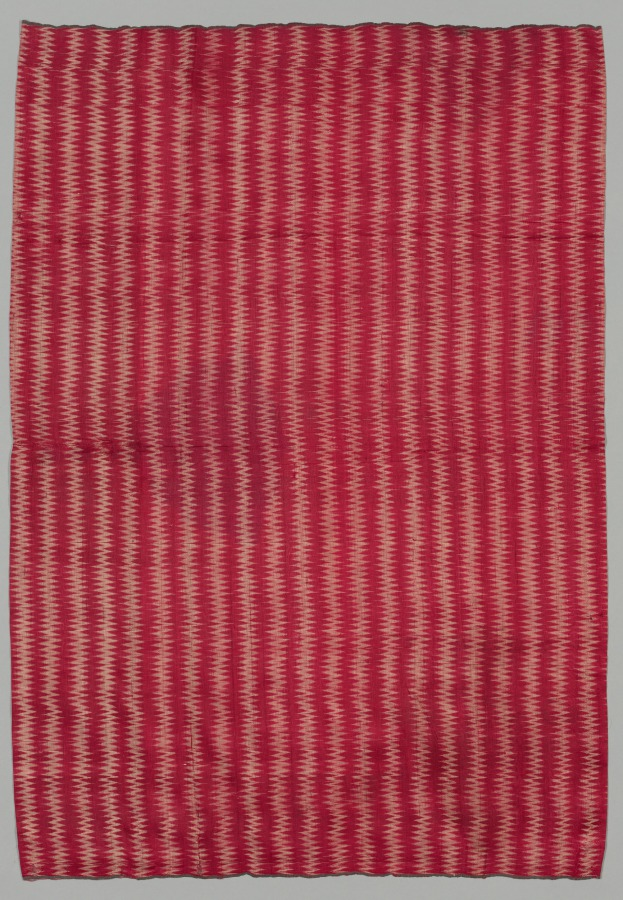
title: Fragment of Striped Panel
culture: Western India, Gujarat, Surat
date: 1900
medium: tabby weave, warp ikat; silk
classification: Textile